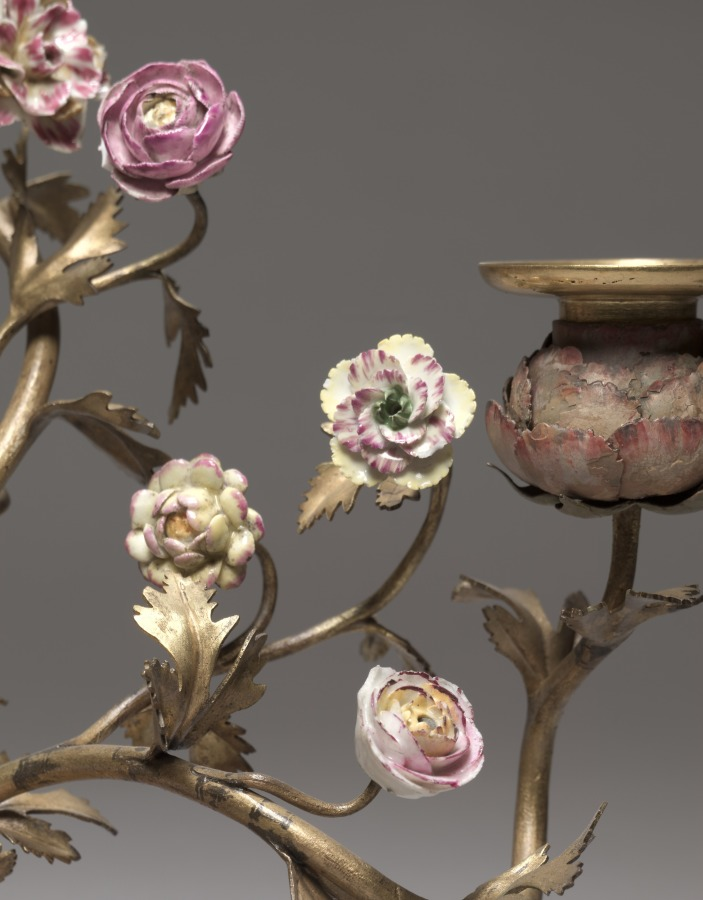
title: Candelabrum with Parrot (Candelabrum)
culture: France, style of Louis XV, 18th century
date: c. 1750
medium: gilt bronze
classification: Furniture and woodwork